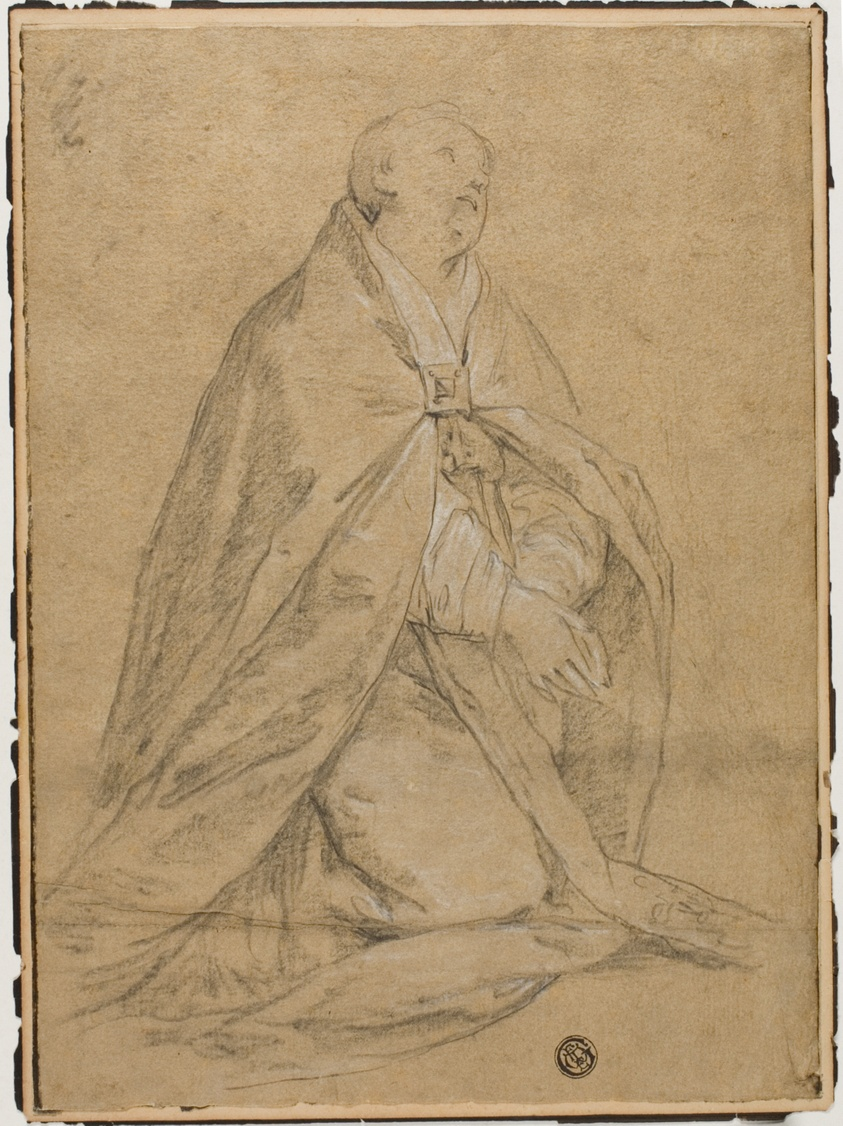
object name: Drawing and Watercolor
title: Kneeling Ecclesiastic Saint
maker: Corrado Giaquinto (Italian, 1693/99-1765); or Circle of Guido Reni (Italian, 1575-1642)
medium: Black chalk heightened with white chalk, on brown laid paper, laid down on tan wove paper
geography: Italy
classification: graphite; drawings (visual works); prints and drawing